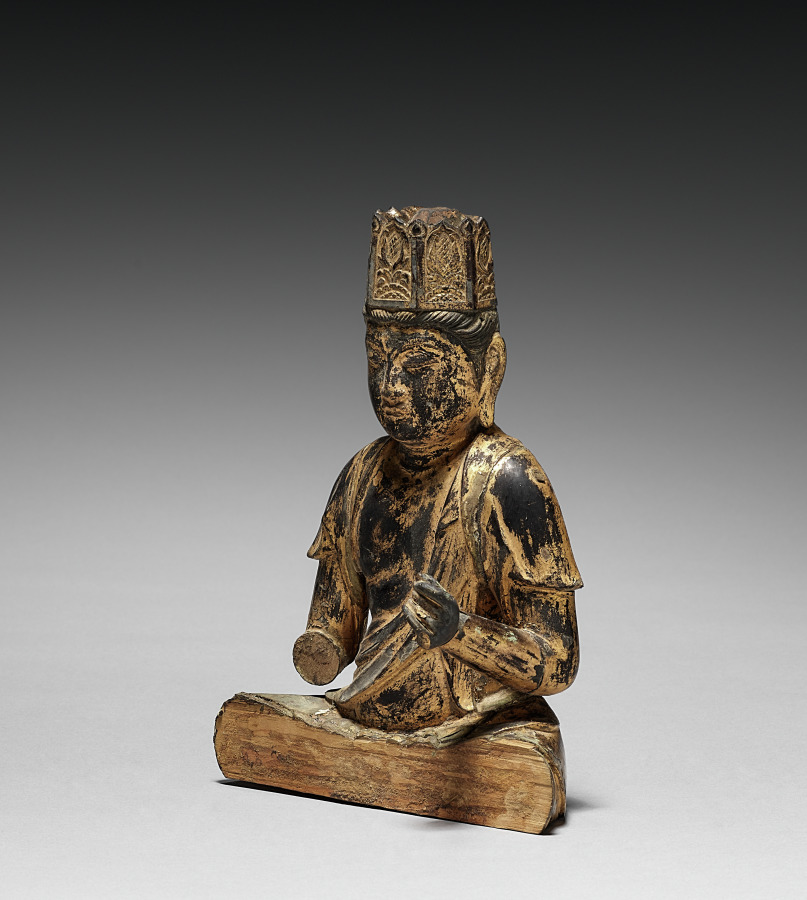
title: Bodhisattva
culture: Japan, Heian period (794–1185)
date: 900s–1100s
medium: gilded wood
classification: Sculpture